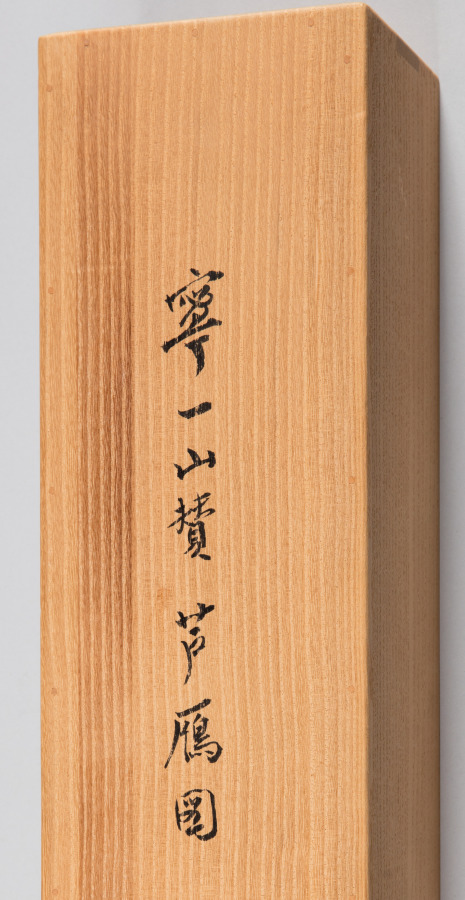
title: Reeds and Geese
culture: Japan, Kamakura period (1185–1333)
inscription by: Yishan Yining [Issan Ichinei] (Chinese, 1247–1317)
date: 1314–17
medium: hanging scroll; ink on paper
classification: Painting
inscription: signed: Issan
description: Reeds and geese has been a common pairing in Chinese literary and visual culture for many centuries. This painting presents the contribution of a Japanese amateur painter, almost certainly a Zen Buddhist monk, to Japan’s fledgling efforts to add the theme to its own cultural vocabulary in the early 1300s. As was customary at the time in Japan, the painter did not sign or seal his work; the inscription, a poem added to the painting by the eminent émigré monk Yishan Yining, along with his signature and seal, was of far greater cultural value. Today, the modestly sized painting has tremendous significance as one of the earliest surviving examples of Japanese ink paintings with reeds and geese.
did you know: Tokyo National Museum owns a copy of this painting made by Kano Gyokusen (1796–1864) when he was 14 years old.